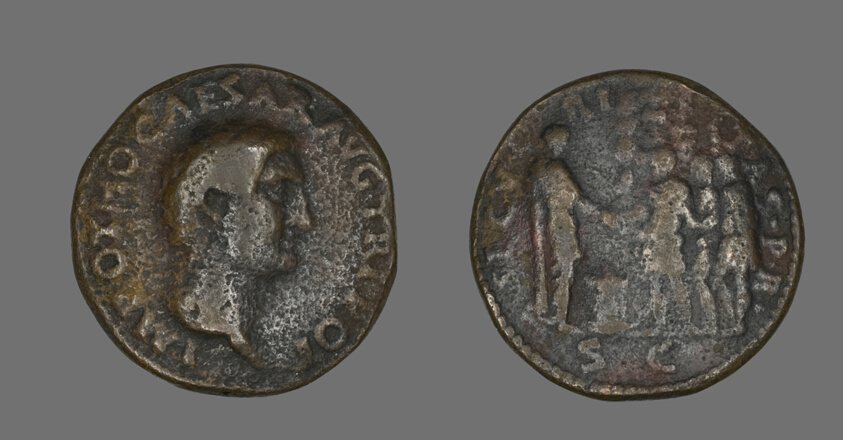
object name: Coin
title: Coin Portraying Emperor Otho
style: imperial (roman), ancient, roman (ancient, style or period)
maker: Roman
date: 69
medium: Bronze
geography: Roman Empire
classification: coin; ancient art